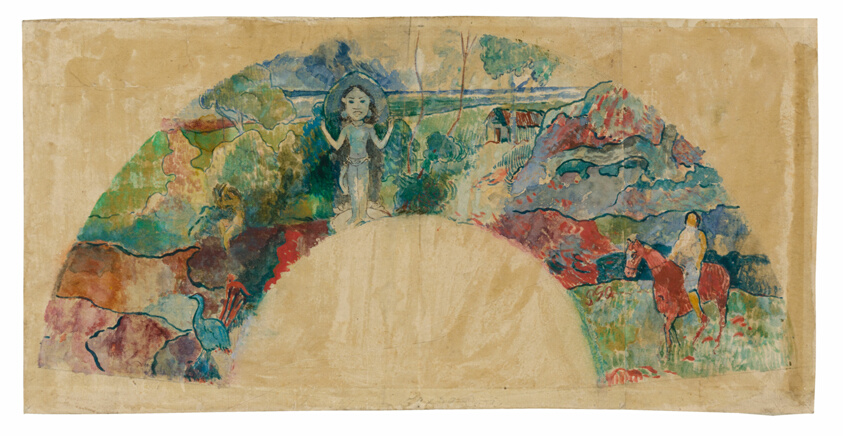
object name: Drawing and Watercolor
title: Design for a Fan Featuring a Landscape and a Statue of the Goddess Hina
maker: Paul Gauguin (French, 1848-1903)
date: 1900/03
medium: Watercolor and gouache, with touches of pen and black ink, over traces of graphite, on cream Japanese paper (pieced), laid down on cream wove paper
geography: France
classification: gouache; watercolor; drawings (visual works); prints and drawing